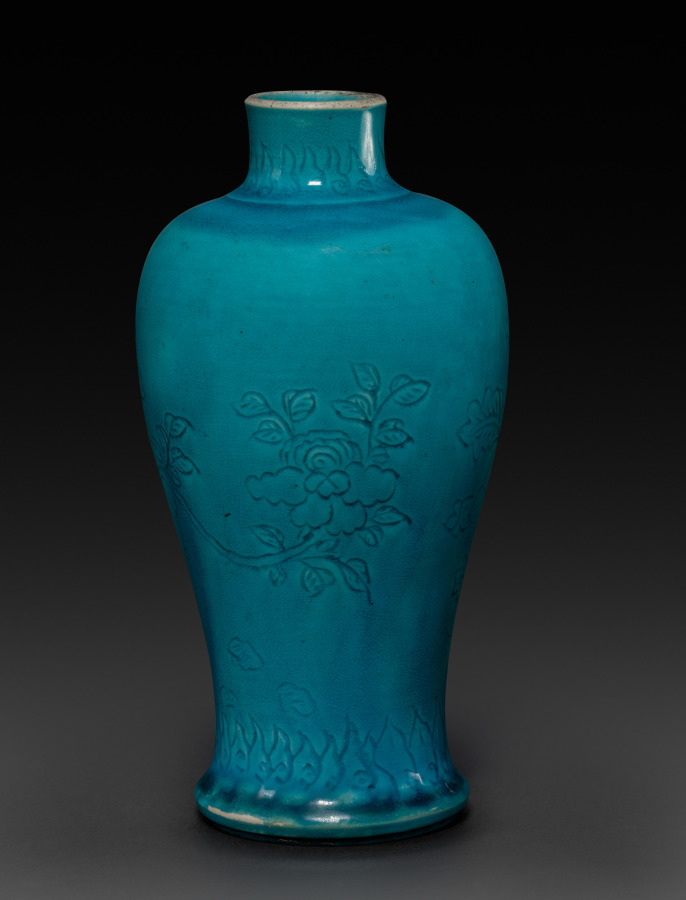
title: Vase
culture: China, Qing dynasty (1644-1911), Kangxi reign (1662-1722)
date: 1662–1722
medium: porcelain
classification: Ceramic